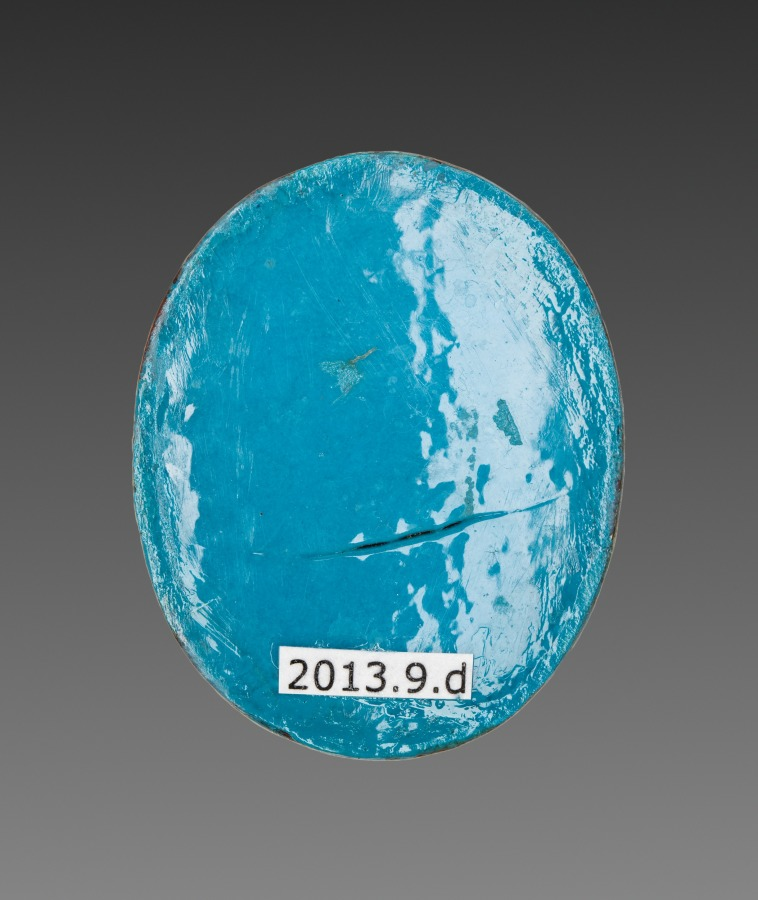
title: Locket Panel (4 of 4)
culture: France, 19th century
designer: Alexis Falize (French, 1811–1898)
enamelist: Antoine Tard (French, active 1860–1889)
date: 1800s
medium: gold and cloisonné enamel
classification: Jewelry